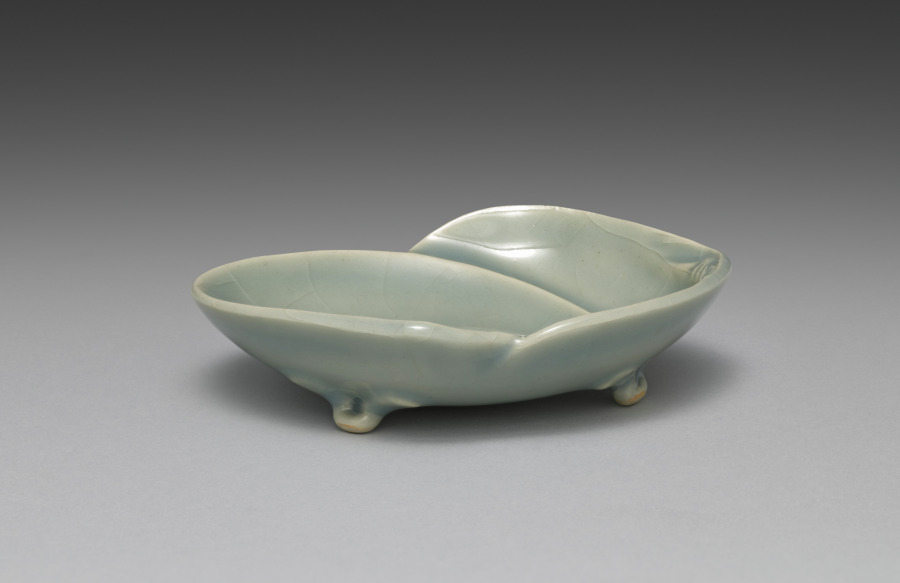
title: Dish from Saucers with Matching Shells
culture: Japan, Meiji period (1868–1912)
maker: Seifū Yohei III (Japanese, 1851–1914)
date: 1893–1914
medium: Porcelain with molded design and green crackled glaze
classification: Ceramic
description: Yohei III’s main output for his sophisticated clientele was in the form of tea sets and dining sets. He created a range of dishes in green glazes. He often produced in pairs, sets of five, or sets of ten. The set of five dishes with a more complex form is described as having a “water-colored glaze” (mizuiroyū). These are shaped like clam half shells, a reference to a game in which shell halves painted with narrative scenes or a variety of motifs must be matched back together by the players. The dishes have molded details to articulate the shell forms, and the crackling across each shell adds another dimension to the surface. Each dish is set on three small feet, formed by a pinched piece of clay and attached to an unglazed area on the underside of the dish. Curiously, while four of the dishes are stamped with the artist’s mark, one has instead a signature carved into the base.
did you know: Each of the paired-shell dishes has its own compartment in a long, flat box.